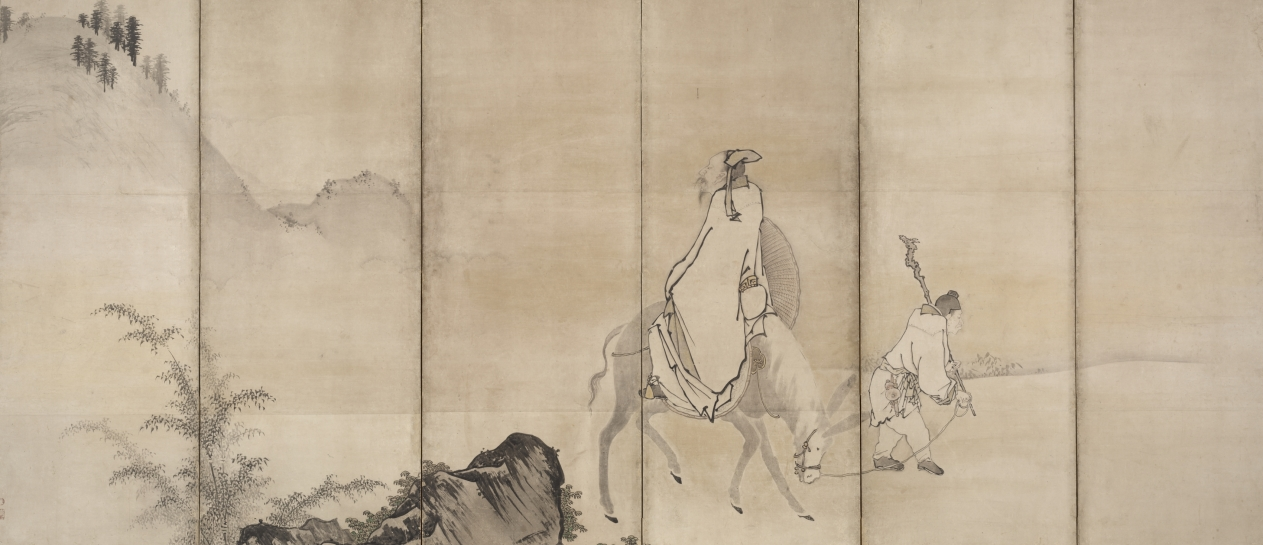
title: Pan Lang (Han Rō)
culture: Japan, Momoyama period (1573–1615)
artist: Unkoku Tōgan (Japanese, 1547–1618)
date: early 1600s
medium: one of a pair of six-panel folding screens; ink, light color, and gold on paper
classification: Painting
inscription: Each screen in the pair is impressed with two seals arranged vertically, a round "Unkoku" seal above and square "Togan" seal below.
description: This is one of the pair of screens depicts episodes from the stories of famed Song-dynasty poets Su Shi of the 1000s and Zhou-dynasty official Pan Lang of the 900s. Both men were banished by their rulers for their perceived missteps. Su Shi’s comments on a series of economic reforms were seen as criticism of the emperor. Pan Lang composed an ill-advised verse about one of the king’s horses. In this screen Pan rides backward on his donkey as he returns from exile so that he may have a last look at his now beloved Mount Hua. Su Shi, on the other screen, is shown embarking on his journey into exile. The artist of these screens, Unkoku Tōgan, was the founder of the Unkoku school of painting, which emulated the style of renowned ink painter Sesshū Tōyō (1420–1506). Tōgan was the official painter of the Mori family of what is now Yamaguchi prefecture in the south of Japan.